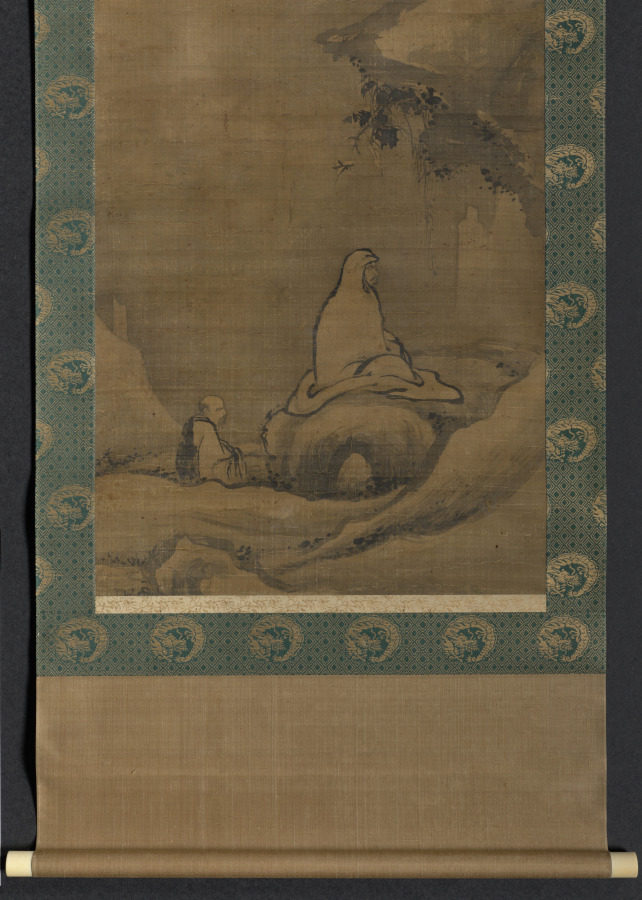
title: Bodhidharma Meditating Facing a Cliff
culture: China, Song dynasty (960-1279)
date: late 1200s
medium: Hanging scroll; ink on silk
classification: Painting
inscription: Spurious artist's seal of Yan Ciping 閻次平 [c. 1163–1189]. WKH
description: Bodhidharma is the legendary founder of Chan (Zen) Buddhism in China. Here he is seen meditating in front of a cliff, atop Mount Song. Behind him is his disciple Huike, the first recipient of his teaching.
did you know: Rough and calligraphic brushwork for landscape and drapery contrasts with more psychologically penetrating representation of the two protagonists' faces.